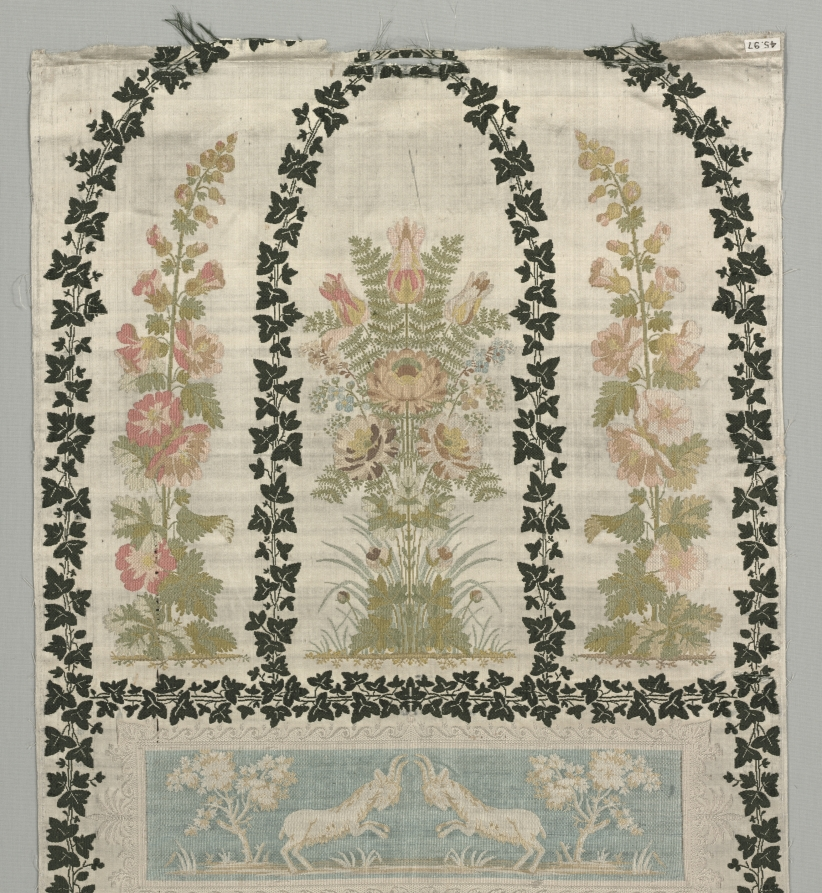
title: Wall Covering with Classical Figure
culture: France, late 18th-early 19th Century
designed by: Philippe de Lasalle (French, 1723–1805)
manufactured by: Camille Pernon & Cie (French)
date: late 1700s - early 1800s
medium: Silk: llampas (satin weave and plain weave variant), brocaded, appliquéd, embroidered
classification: Textile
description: France developed a thriving silk industry in Lyon with the goal of becoming the fashion center of Europe. Employment soared to some 20,000 workers by the time of the French Revolution in 1789. Designs changed annually, colors established new fashions, and spectacular silks were produced during the late 1700s. Philippe de Lasalle, trained as a painter by François Boucher, became the celebrated chief textile designer for Camille Pernon & Cie, purveyors to King Louis XVI (reigned 1785-90). Lasalle’s floral style with large and balanced designs, enhanced here with a fashionable classical figure, displays his preference for lighter forms without the opulent gold thread of earlier brocaded silks.